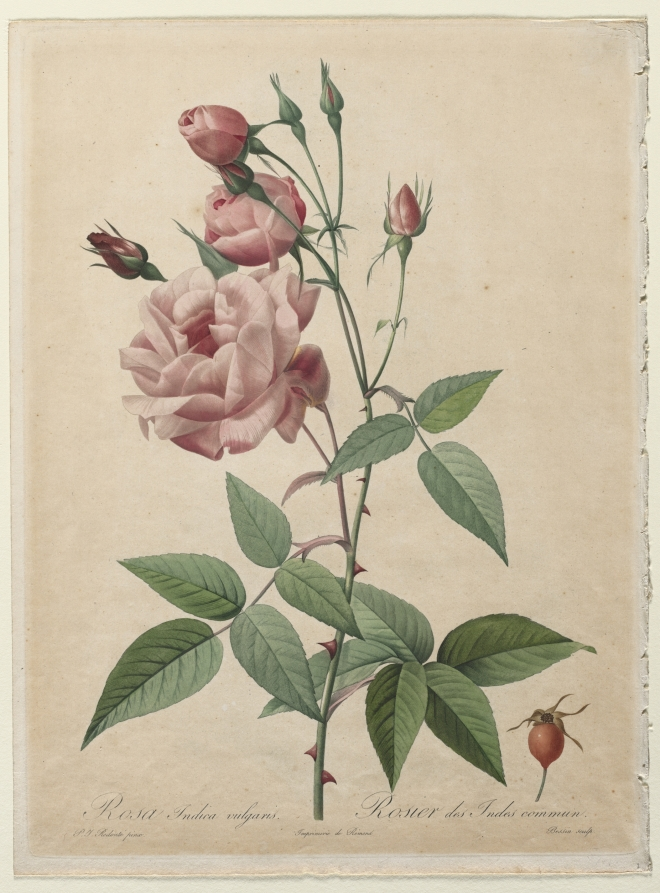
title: The Roses: China or Bengal Rose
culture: France, 19th century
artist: Henri Joseph Redouté (French, 1766–1853)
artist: after Bessin (French)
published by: Pierre-Joseph Redouté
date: 1817–1824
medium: color stipple with watercolor added by hand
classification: Print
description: Hailed as the "Raphael of Flowers," Redouté achieved an international reputation for his botanical illustrations in watercolor, which were interpreted in the most refined techniques of stipple engraving and published in lavish portfolios. He was close friends with the empress Joséphine who, after marrying Napoléon Bonaparte in 1795, built an immense hothouse to shelter her magnificent collection of rare and exotic plants and opulent gardens at their country estate, Malmaison. Joséphine also spent vast sums to catalogue her floral collections and so commissioned Redouté to record her 250 different species of roses. Redouté employed a workshop of 18 printmakers to execute the plates, which were inked à la poupée (see glossary) and then retouched with watercolor.